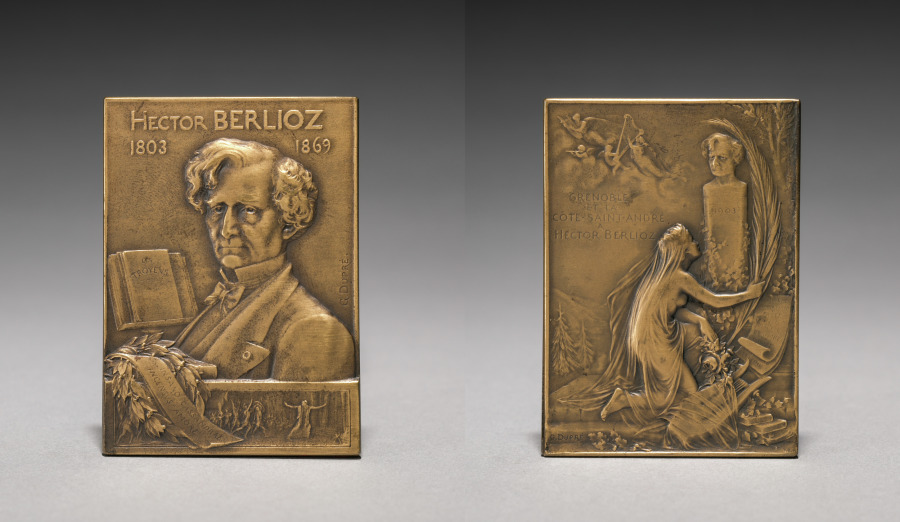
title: Medallion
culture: France, early 20th century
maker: Georges Dupré (French, 1869-1909)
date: 1903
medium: bronze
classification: Plaque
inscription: "Grenoble et la côte-saint-andré à Hector Berlioz"; signed: "G. Dupré."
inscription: INSANO CASSANDRAE INCENSUS AMORE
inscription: Les Troyens